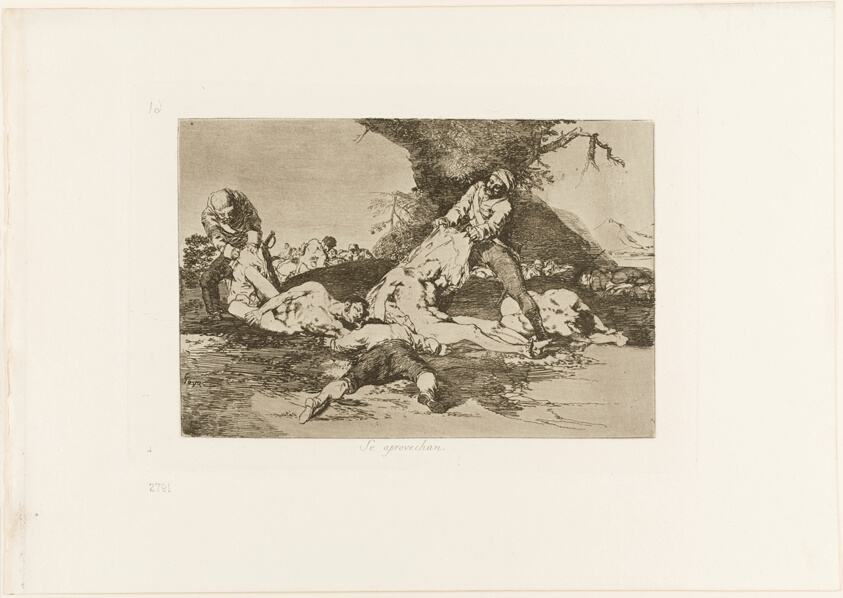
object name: Print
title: They Make Use of Them, plate 16 from The Disasters of War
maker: Francisco José de Goya y Lucientes (Spanish, 1746-1828)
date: 1810/12, published 1863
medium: Etching, lavis, drypoint, burin, and burnishing on ivory wove paper with gilt edges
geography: Spain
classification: etching; print; prints and drawing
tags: war